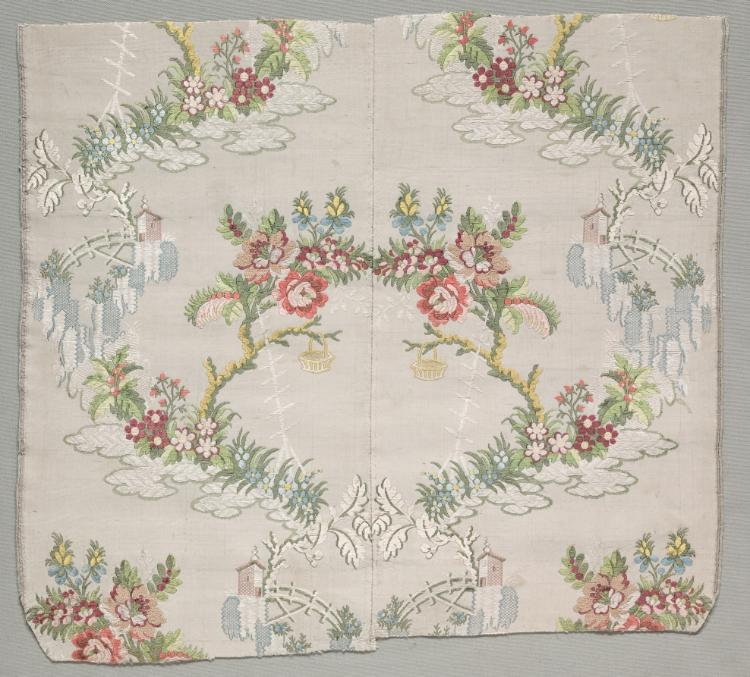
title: Two Joined Fragments of Figured Silk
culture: France, 18th century, Period of Louis XV (1723-1774)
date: 1723–1774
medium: taffeta, brocaded; silk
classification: Textile